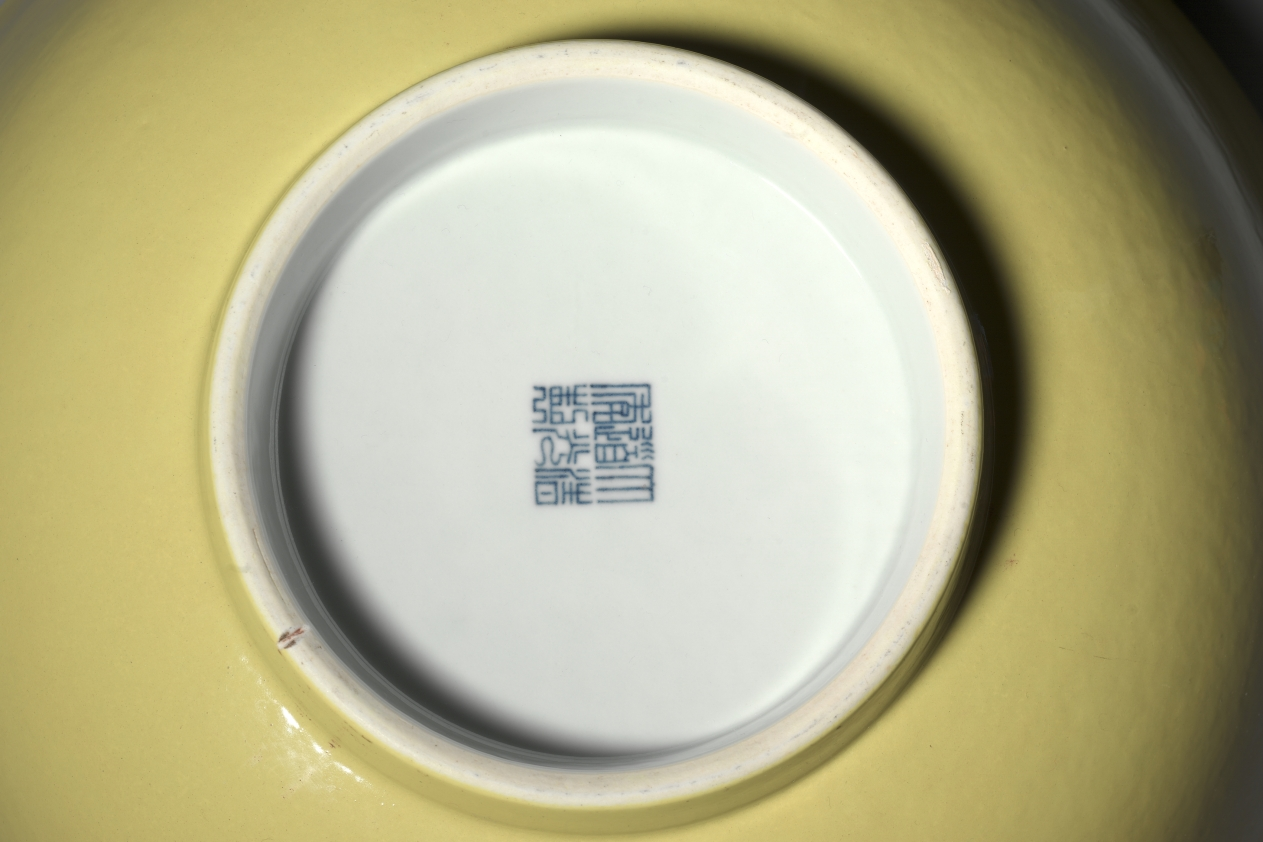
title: Large Bowl with Yellow Enamel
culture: China, Qing dynasty (1644-1911), Daoguang mark and reign (1821-50)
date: 1821–50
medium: enameled porcelain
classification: Ceramic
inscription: 大清道光年制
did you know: This monochromatic yellow dish was made for the imperial household.